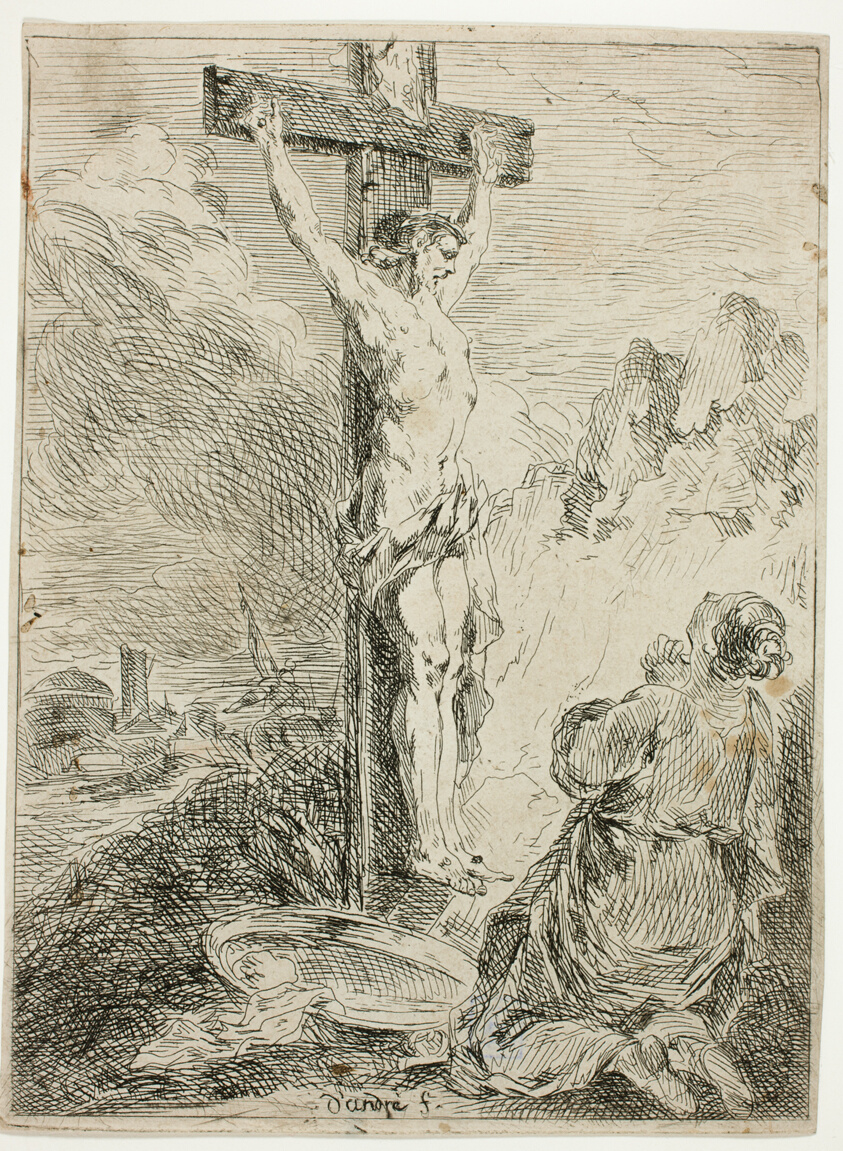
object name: Print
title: Christ on the Cross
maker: Michel François Dandré-Bardon (French, 1700-1783)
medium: Etching on paper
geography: France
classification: etching; print; prints and drawing